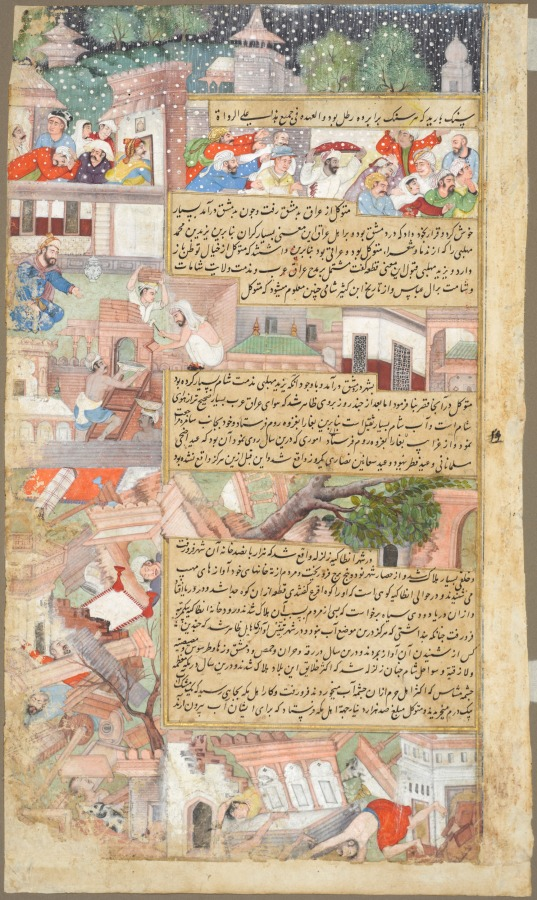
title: Page of disasters, from the Tarikh-i Alfi (History of the Thousand [Years])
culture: India, Mughal school, 16th century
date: c. 1595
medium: Gum tempera, ink, and gold on paper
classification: Painting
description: The 1,000th anniversary of Islam, according to the Hijri calendar followed by the Mughals and all Muslims, occurred during Akbar’s reign in 1592. He commemorated this milestone in many ways, including the commissioning of a new history of the Islamic world since the death of the Prophet Muhammad in 632. The episode discussed on this page took place during the 800s, when hailstorms beset Egypt and an earthquake hit Syria. The ruling caliph at the time was strongly prejudiced against Muslims who belonged to the Shi‘ite branch of Islam. Akbar seemed to be asking his artists to emphasize the natural disasters that took place, suggesting that they occurred as a result of the ruler’s intolerance.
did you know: Devastation after an earthquake includes a horse trapped under a fallen pavilion.